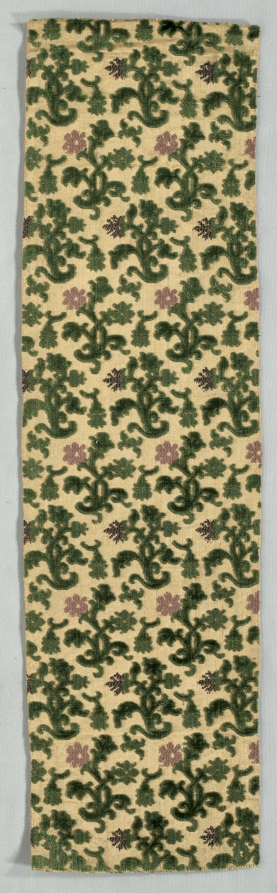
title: Velvet Fragment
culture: Italy, early 17th century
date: early 1600s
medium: velvet (cut, uncut, and voided); silk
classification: Velvet